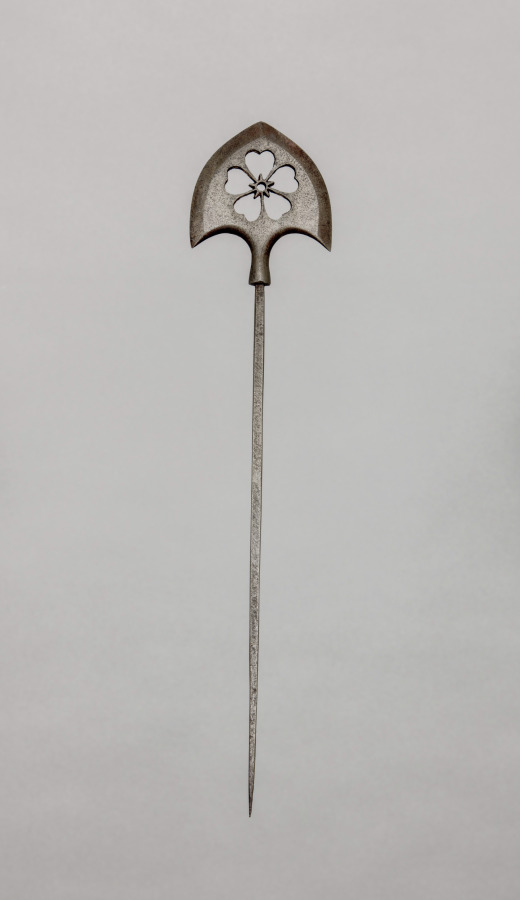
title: Arrow Head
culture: Japan, Edo period (1615–1868)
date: 1600s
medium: iron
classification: Arms and Armor